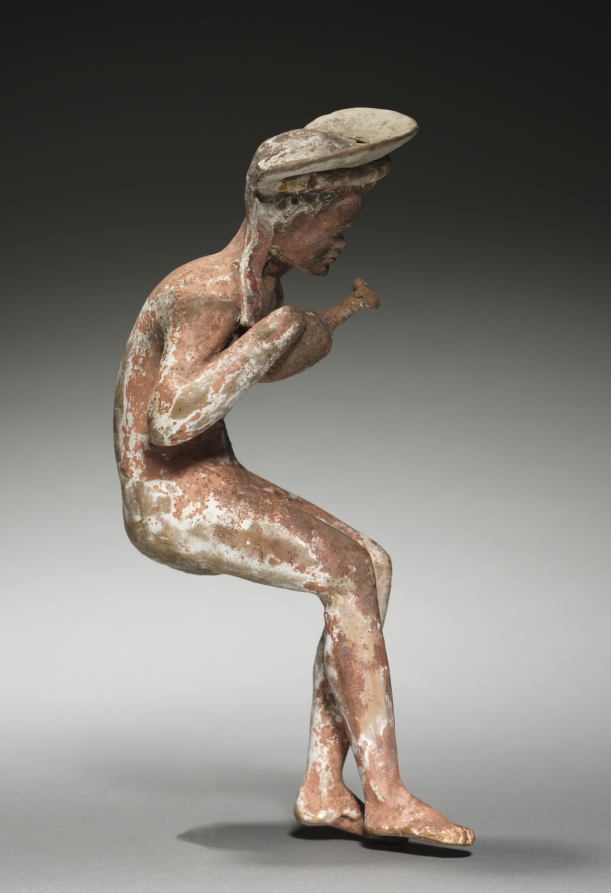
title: Seated Man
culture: Greece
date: 400–300 BCE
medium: painted terracotta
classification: Sculpture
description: This statuette takes the form of a seated male figure, nude but for a large headdress or hat with a yellow and red–striped ribbon beneath it. The ends of the ribbon trail down over each shoulder. In his right hand he holds a pitcher, and his left arm is missing below the shoulder. His entire body is painted a pinkish red over a white slip.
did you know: The pitcher in the figure’s hand, called an oinochoe, was used in ancient Greece to pour wine.